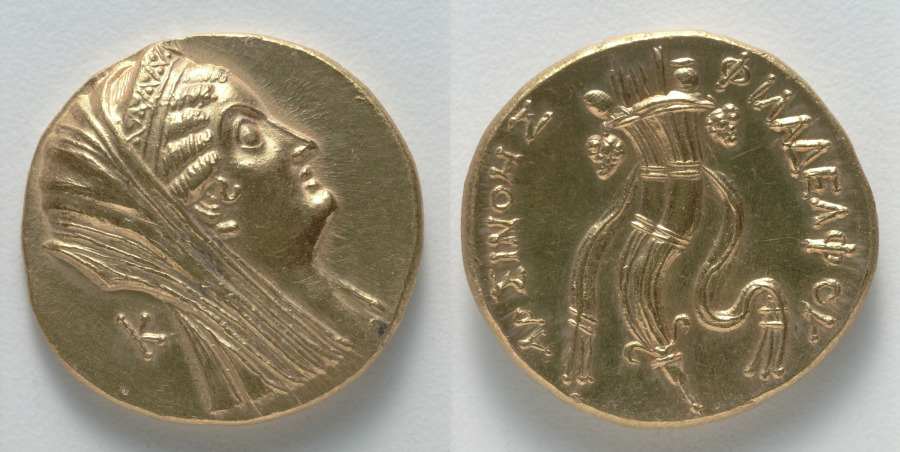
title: Octodrachm: Head of Arsinoe II (obverse); Double Cornucopia (reverse)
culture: Greek, Ptolemaic, minted at Alexandreia (Egypt), reign of Ptolemy V Epiphanes or Ptolemy VI Philometor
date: 205–145 BCE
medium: gold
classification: Coins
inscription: ΑΡΣΙΝΟΗΣ | ΦΙΛΑΔΕΛΦΟΥ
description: On this long-lived series of coinage, Arsinoe II, a divinized Hellenistic queen, wears the crown and veil associated with Hera; a scepter may be just visible beside her neck. The daughter of Ptolemy I, founder of the Hellenistic Greek dynasty that ruled Egypt for nearly three centuries, Arsinoe married Lysimachos, king of Thrace, at the age of fifteen. After his death, she married first her half-brother and then her full brother, Ptolemy II, beginning a long-lasting Ptolemaic dynastic tradition of sibling marriage. Twin cornucopias on the reverse of this coin likely refer to the divine ruling couple, presaged in Egypt by Isis and Osiris, and in Greece by Zeus and Hera.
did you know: The small horn around Arsinoe’s ear, referencing the Egyptian god Amon-Re, marks her divine status.